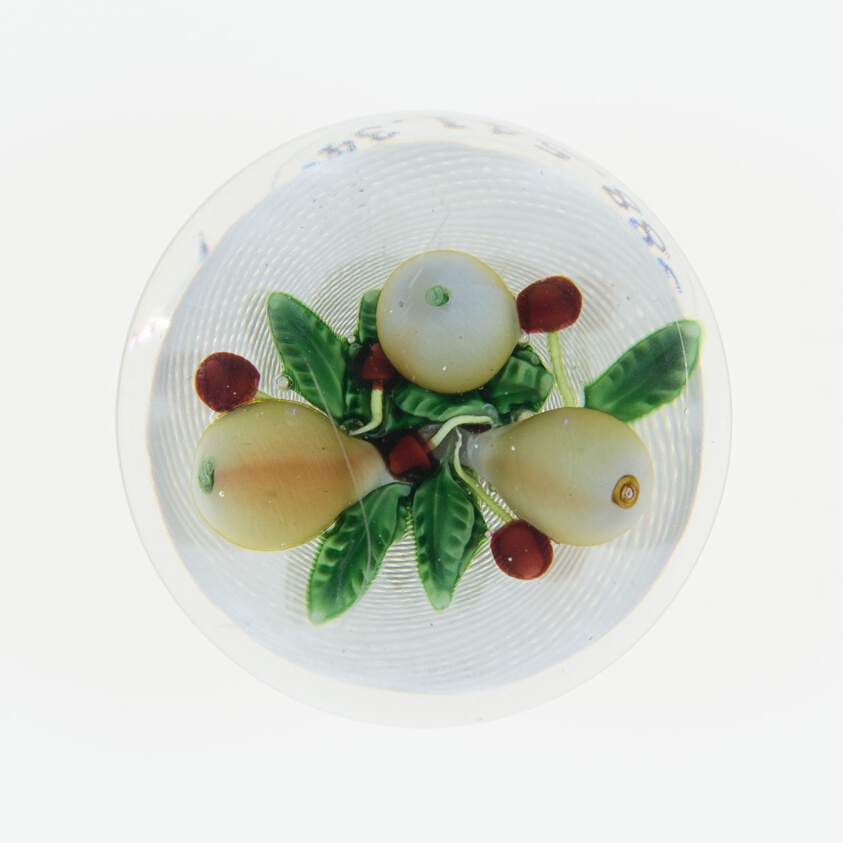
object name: Glass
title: Paperweight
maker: Saint-Louis Glassworks (Cristalleries de Saint-Louis); Lorraine, France, founded 1586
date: c. 1845–60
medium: Glass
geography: Saint-Louis-lès-Bitche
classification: paperweight; glass